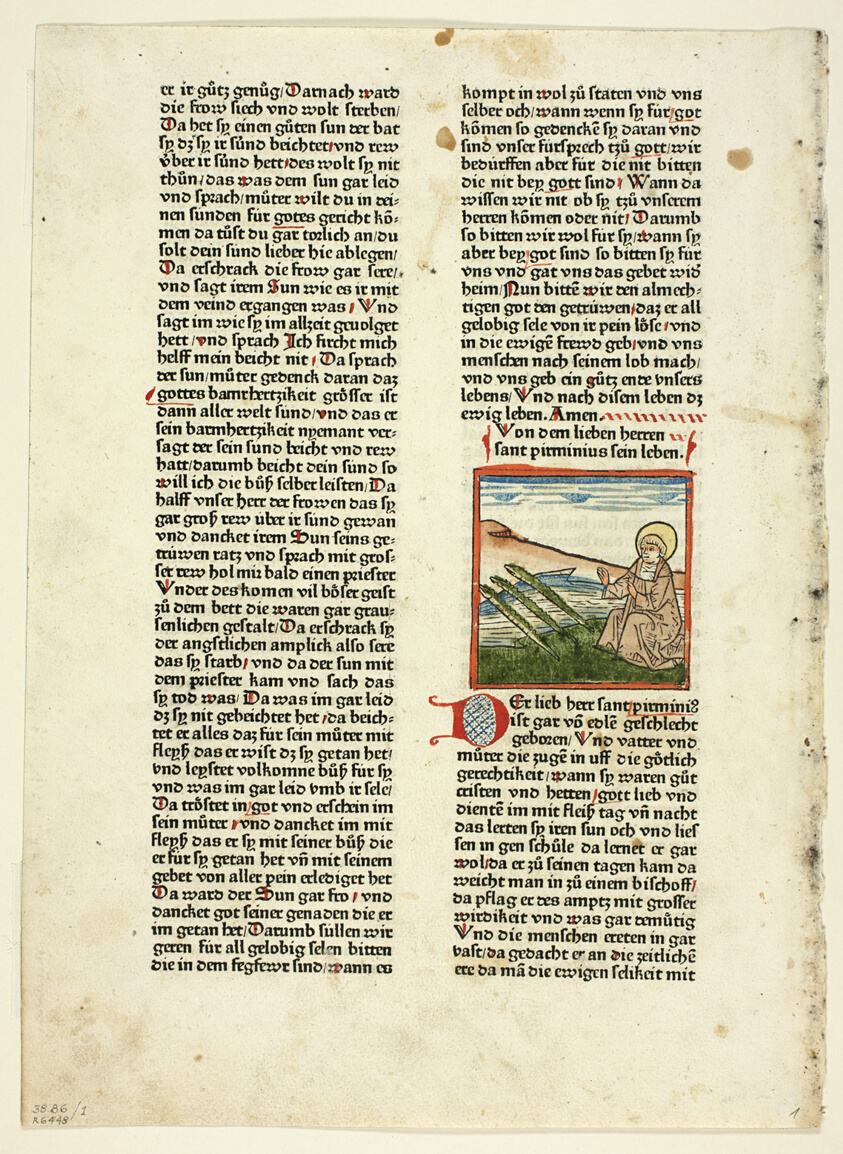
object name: Print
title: Life of Saint Pirminius from Heiligenleben, Winterteil (Lives of the Saints, Wintertime), Plate 1 from Woodcuts from Books of the 15th Century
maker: Unknown Artist (Augsburg, 15th century); printed and published by Günther Zainer (German, active 1468-1478); original text by Jacobus de Voragine (Italian, c. 1230–1298); portfolio text by Wilhelm Ludwig Schreiber (German, 1855–1932)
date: 1471, portfolio assembled 1929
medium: Woodcut in black with hand-colored additions, and letterpress in black with rubrication (recto and verso), on cream laid paper, tipped onto cream wove paper mat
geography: Germany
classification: woodcut; print; prints and drawing